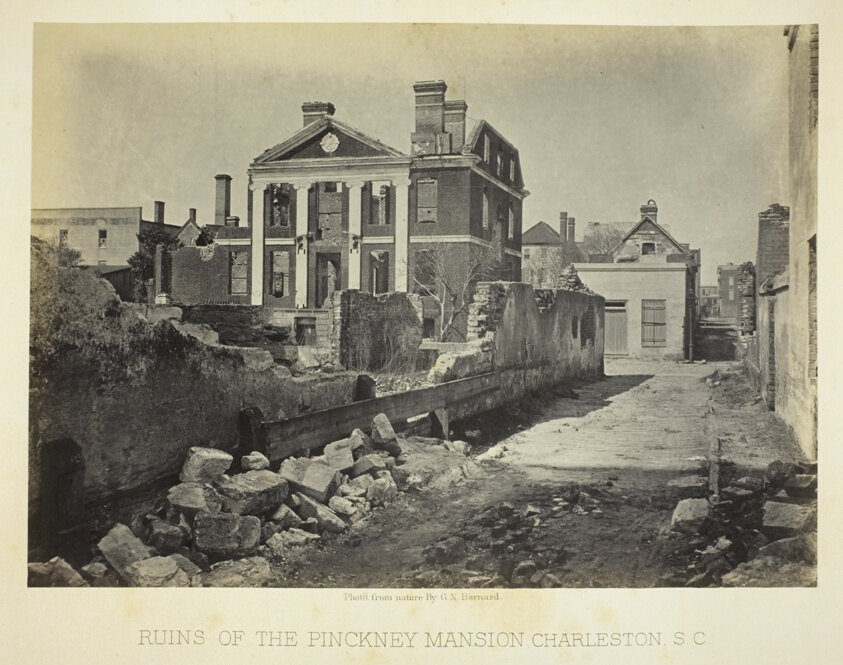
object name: Photograph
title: Ruins of the Pinckney Mansion, Charleston, S.C.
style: 19th century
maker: George N. Barnard (American, 1819–1902)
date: 1865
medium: Albumen print, plate 59 from the album "Photographic Views of the Sherman Campaign" (1866)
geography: United States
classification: albumen silver print; photographic process; photography; photograph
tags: Collected by Hugh Edwards, Sherman's Campaign 1866